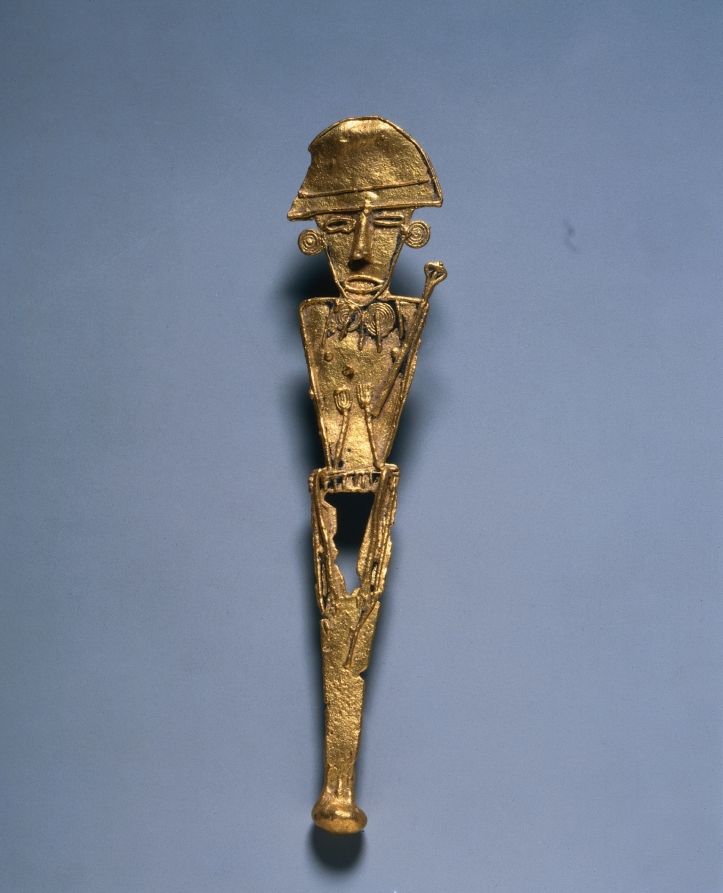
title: Tunjos (Votive Offering Figurine)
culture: Colombia, Muisca style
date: c. 900–1550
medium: cast gold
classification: Metalwork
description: Unlike the other gold ornaments made in the isthmian region, tunjos were not worn; instead, they served as offerings that were deposited in sacred places such as lagoons and caves. They often depict humans who hold something. Perhaps because they were not meant for display, tunjos were not finished after lost-wax casting. Flaws remain uncorrected, surfaces are unpolished, and gold that backed into the channel used to pour the molten metal into the mold was left in place.